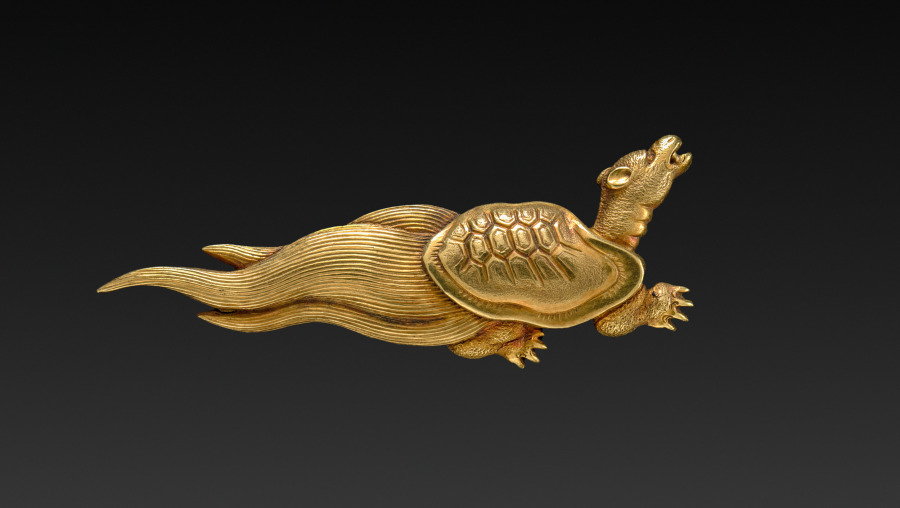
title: Tortoise-shaped Sword-Grip Ornament (Menuki)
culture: Japan, possibly Edo period (1615-1868)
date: c. 1615–1868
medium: gilt bronze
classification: Metalwork